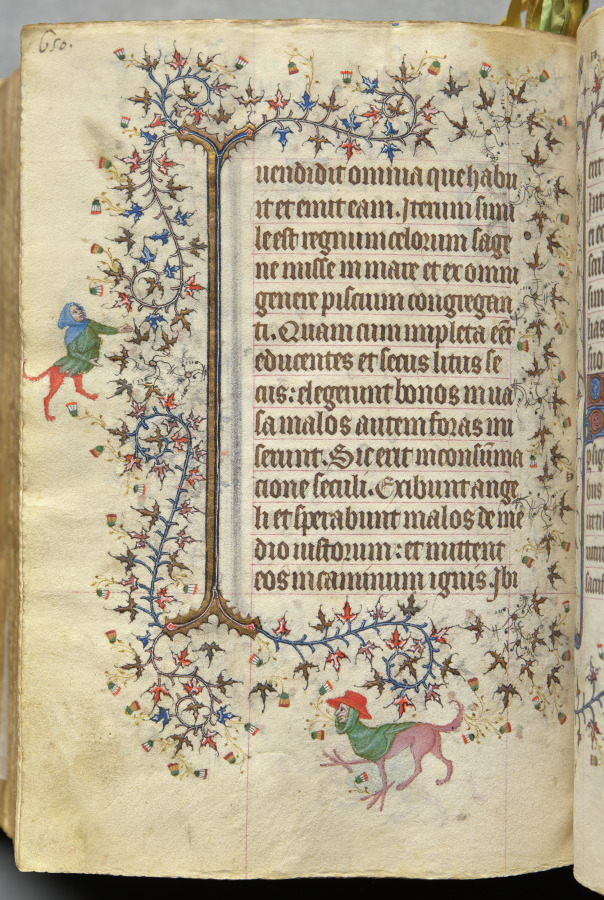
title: Hours of Charles the Noble, King of Navarre (1361-1425), fol. 319v, Text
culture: France, Paris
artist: Master of the Brussels Initials and Associates (French)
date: c. 1405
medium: ink, tempera, and gold on vellum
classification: Bound Volume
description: This precious book was highly prized by its owner, Charles III, King of Navarre, a French-born prince whose coat of arms is painted on 20 folios. Charles visited Paris on numerous occasions and likely acquired this volume there in 1404. Paris was the center of the European book trade at the time and attracted illuminators from many parts of Europe. This manuscript represents one of the most remarkable fusions of French and Italian taste in book illumination. Though conforming to Parisian standards, most of the book’s major miniatures are the work of the Brussels Initials Master, an Italian illuminator who previously worked in Bologna and Padua.